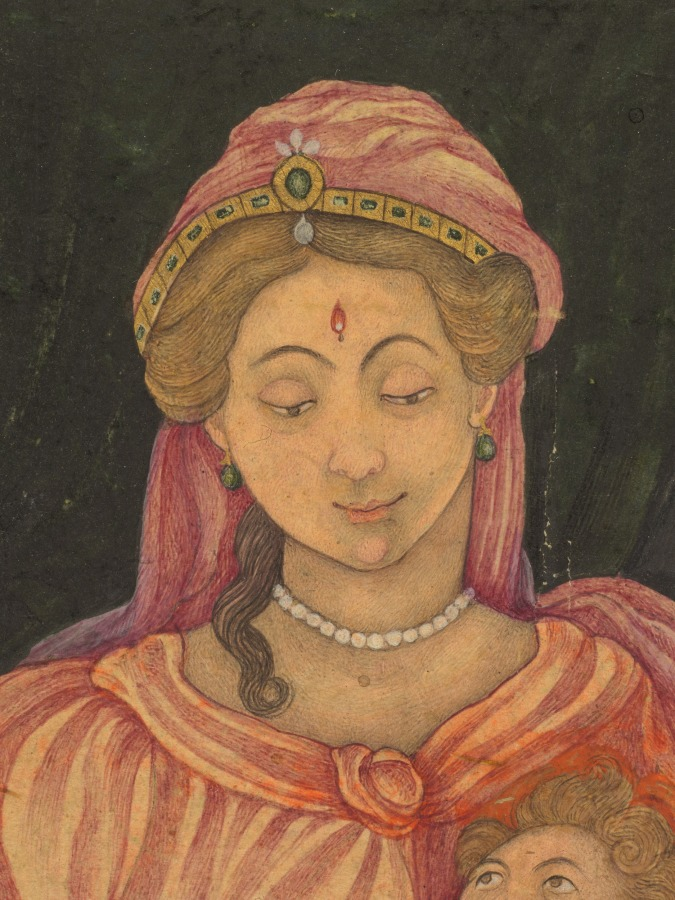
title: The Holy Family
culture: Northern India, Mughal court, early 17th century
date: c. 1620s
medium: Gum tempera and gold on paper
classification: Painting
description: This painting of Joseph, the Virgin Mary, and the infant Jesus is based on European sources, but it also contains several details that are specifically Indian. For example, although Mary is dressed in classical European-style robes, she is adorned with jewelry of rubies and emeralds, the preferred gems of Mughal royalty. Her fingertips are also red with henna, and she wears a bindi on her forehead. The detailed rendering of the vase evokes the Catholic St. Francis as well as Indian worship of the sun. The vessel itself points to the appreciation of Chinese blue-and-white ware imported from imperial Ming-dynasty kilns to the court of Jahangir (reigned 1605–27).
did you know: With hennaed fingertips Mary holds the vase so baby Jesus doesn’t tip it over.